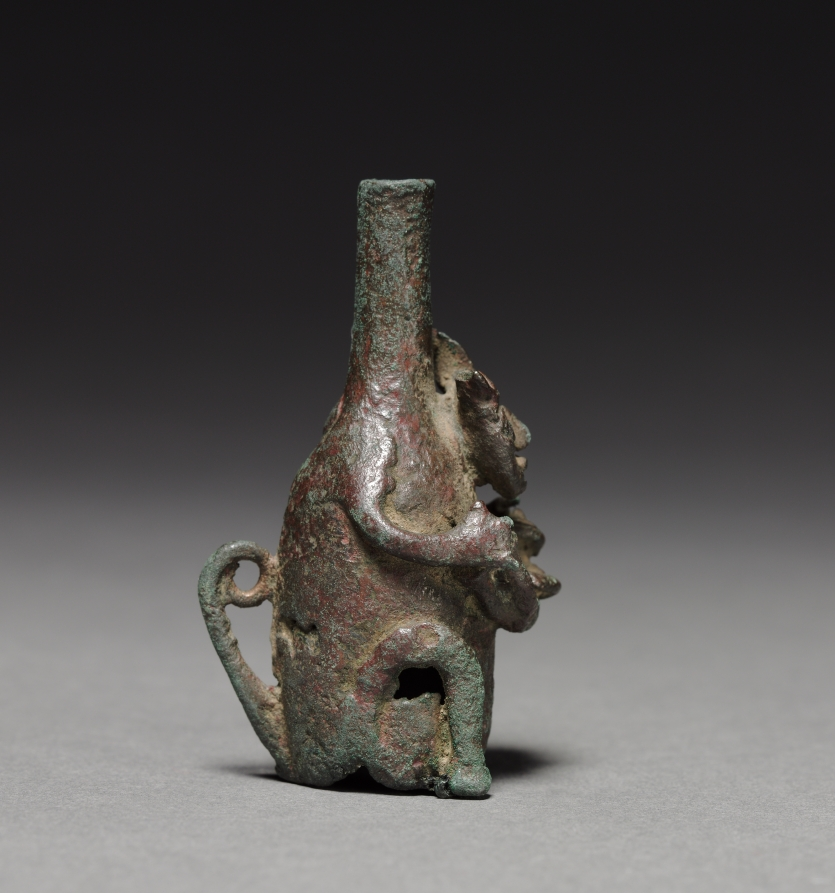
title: Feline Holding Human Figure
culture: Peru, North Coast, Moche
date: c. 100–500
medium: banded travertine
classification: Metalwork